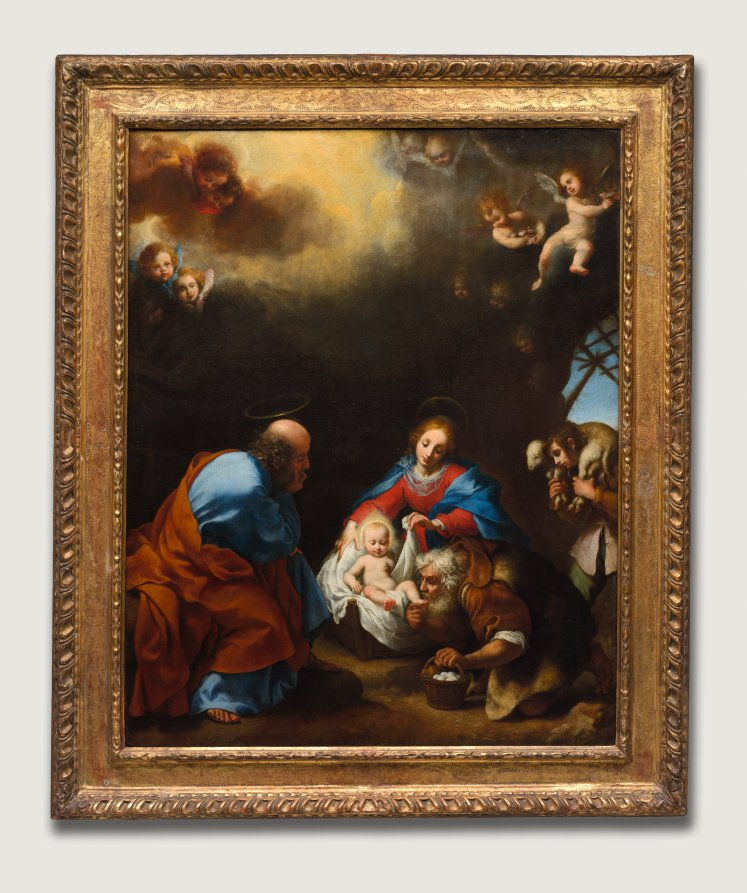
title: Adoration of the Shepherds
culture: Italy, 17th century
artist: Carlo Dolci (Italian, 1616–1687)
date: c. 1670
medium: oil on canvas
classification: Painting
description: The historical significance of the Baroque painter Carlo Dolci, a precocious artist whose skill was recognized early by the leading Florentine patrons of his time, is often diminished due to his traditionalist compositions. Having gained local reputation as a talented portraitist and painter of religious narrative, Dolci's anti-Mannerist technique dismissed many of the leading Baroque trends as superfluous, retaining an unobtrusive and placid style in the manner of those before him. Having been a devout follower of the brotherhood of St. Benedict, Dolci draws upon a strict Christian iconography in his depiction of the shepherds' witness account of the birth of Christ. --Charles Eppley (January 2009)